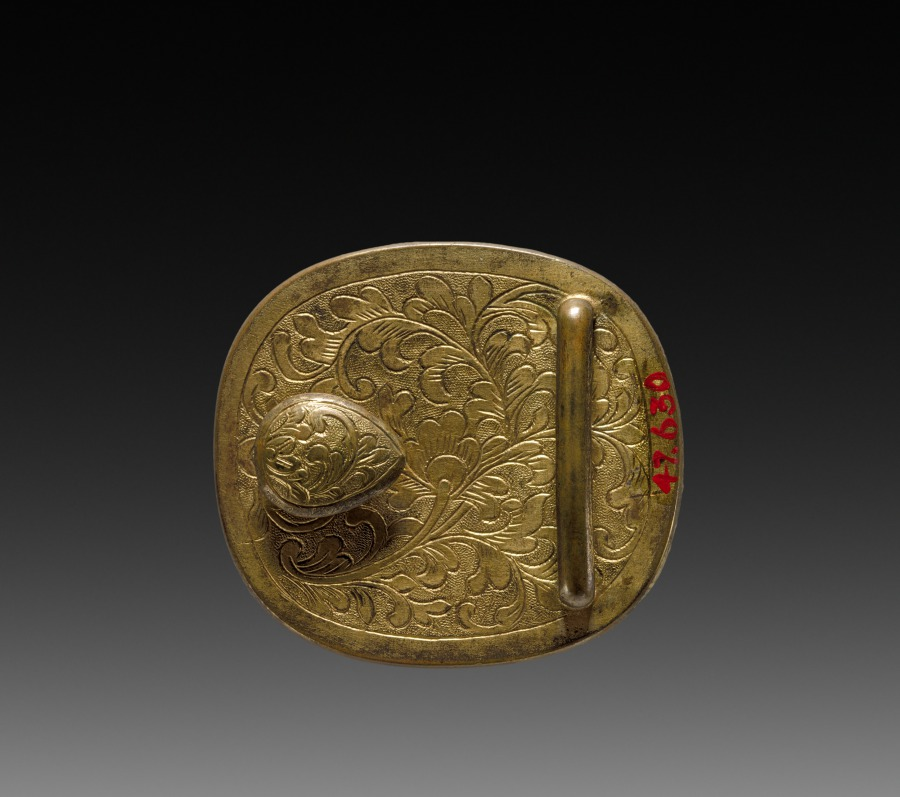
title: Buckle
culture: China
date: 1900s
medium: brass, engraved and set with glass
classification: Jewelry